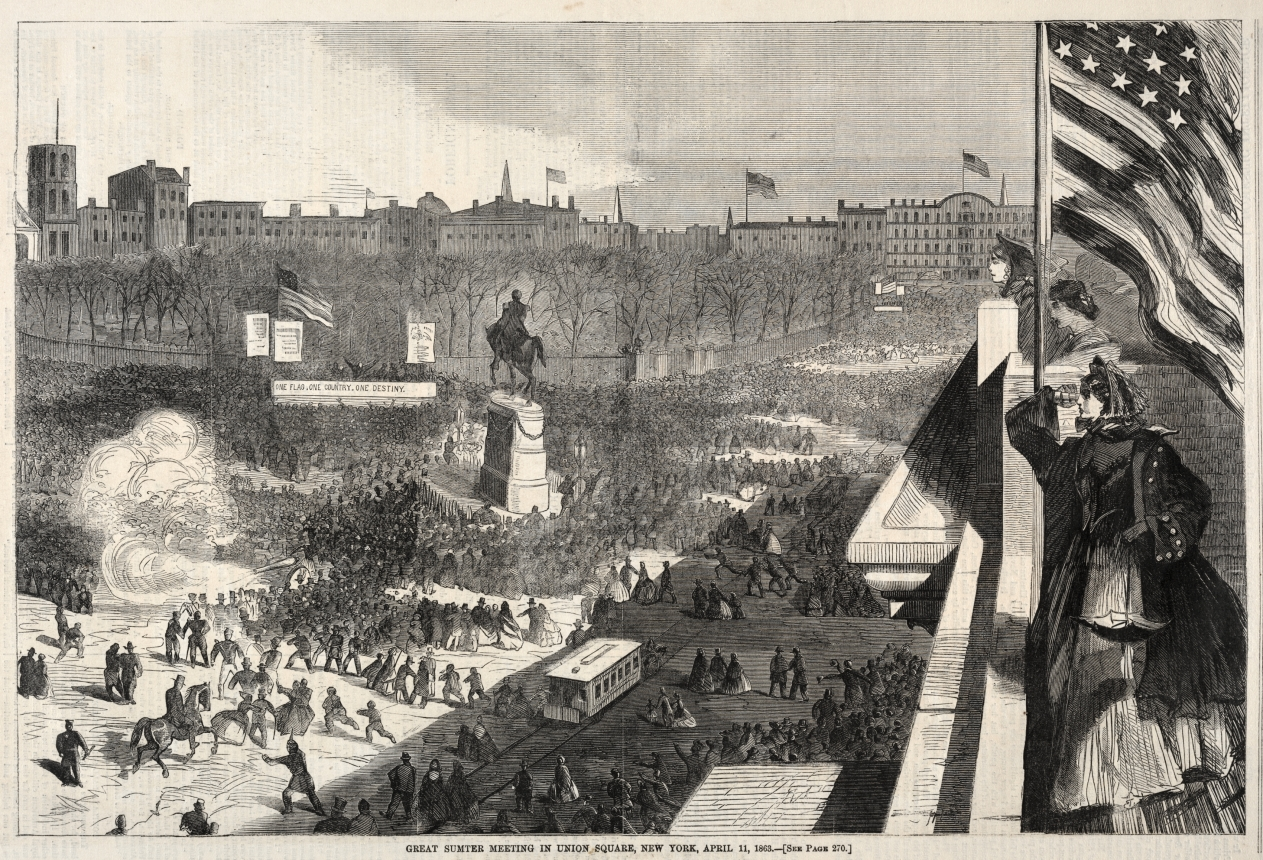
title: Great Sumter Meeting in Union Square, New York, April 11, 1863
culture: America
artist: Winslow Homer (American, 1836–1910)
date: 1863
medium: wood engraving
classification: Print